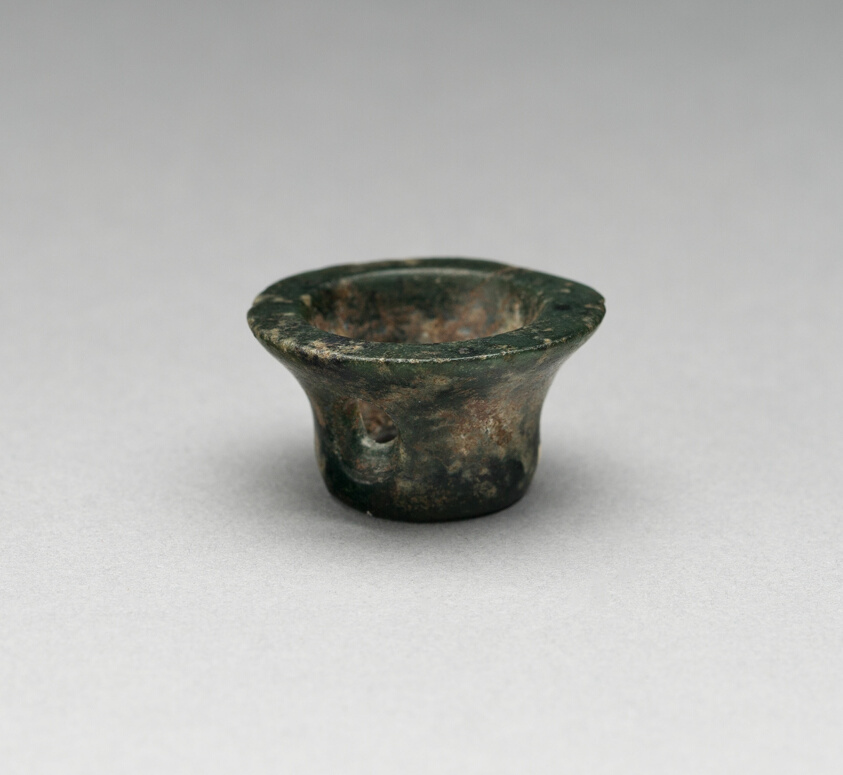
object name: Costume and Accessories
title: Earflare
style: mesoamerican, Arts of the Americas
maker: Possibly Oaxaca, Mexico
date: Possibly 500 BCE–1000 CE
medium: Jadeite or serpentine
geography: Oaxaca state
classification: ear ornament; stone; jewelry; costume; art of the americas